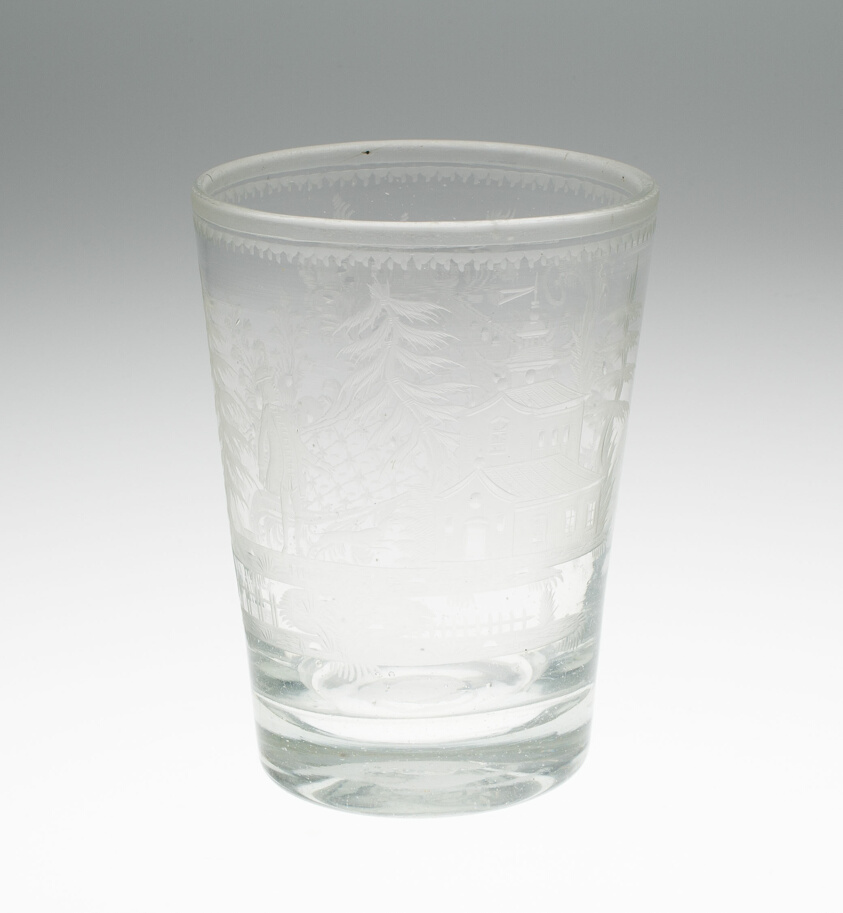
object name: Glass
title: Beaker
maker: Russia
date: c. 1760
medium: Glass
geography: Russia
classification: drinking vessel; glass; european decorative arts